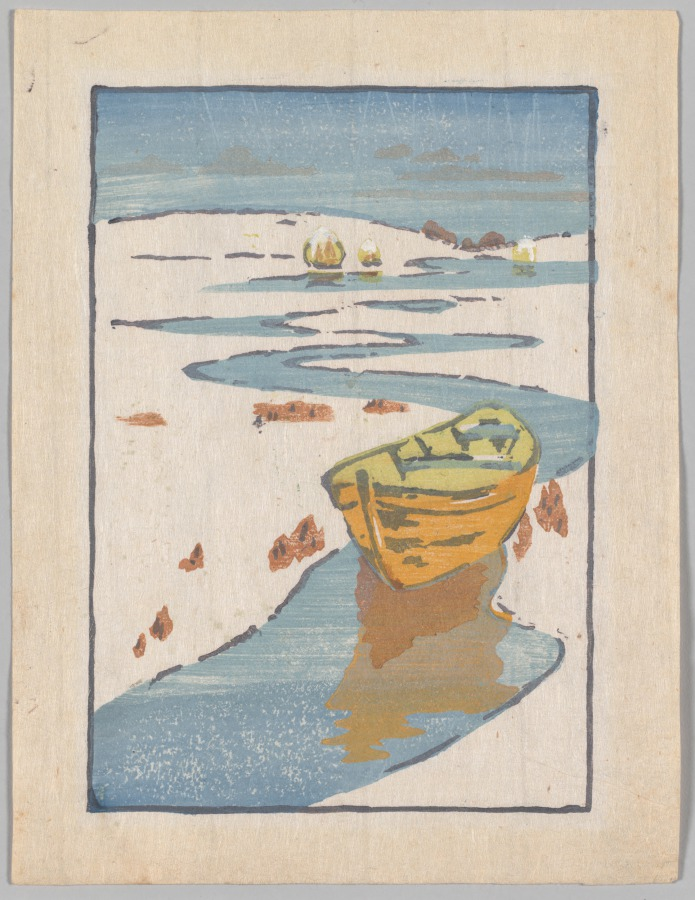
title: The Derelict, or the Lost Boat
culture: 20th century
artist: Arthur Wesley Dow (American, 1857–1922)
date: 1916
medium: color woodcut on Japanese paper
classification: Print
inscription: In graphite at lower left on verso: “5.2”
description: The American artist Arthur Wesley Dow was an influential teacher, emphasizing the study of line, color, and form rather than direct observation from nature. Works such as this print, which depicts an abandoned rowboat, were inspired by Dow’s admiration for the flattened style of Japanese prints. He experimented by inking his woodblock with different combinations of color, often resulting in virtually unique impressions.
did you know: Dow inked his woodblock with different colors each time he printed, resulting in unique variations of the same image.